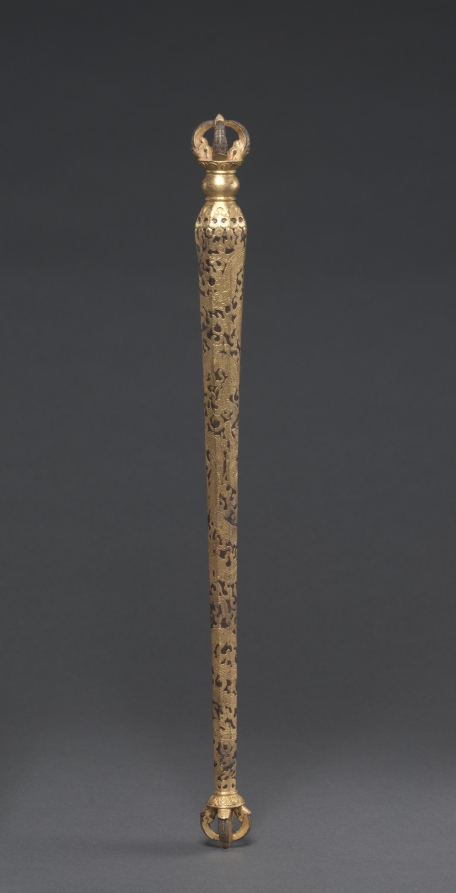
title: Ritual Mace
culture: Sino-Tibetan, Derge School, Yongle period (1403-1427)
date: early 1400s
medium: iron alloy with gold inlay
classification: Metalwork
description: Ceremonial weaponry was used in tantric rituals to combat obstacles to enlightenment, such as ignorance and uncontrolled passions. In 1407 a high-ranking Tibetan monastic patriarch visited the emperor of the Ming dynasty, known as Yongle. The Yongle emperor presented him with a number of gifts, of which the axe, mace, flaying knife, incense burner (1983.154), and the gilt bronze Virupa (1972.96) appear to have been a part, since the sculpture and the axe bear his identifying inscription in a cartouche. Imperial Chinese workmanship is noted in the lush rendering of the lion heads from which the blades emerge, the calligraphic serpentine forms, and the cloud motifs.